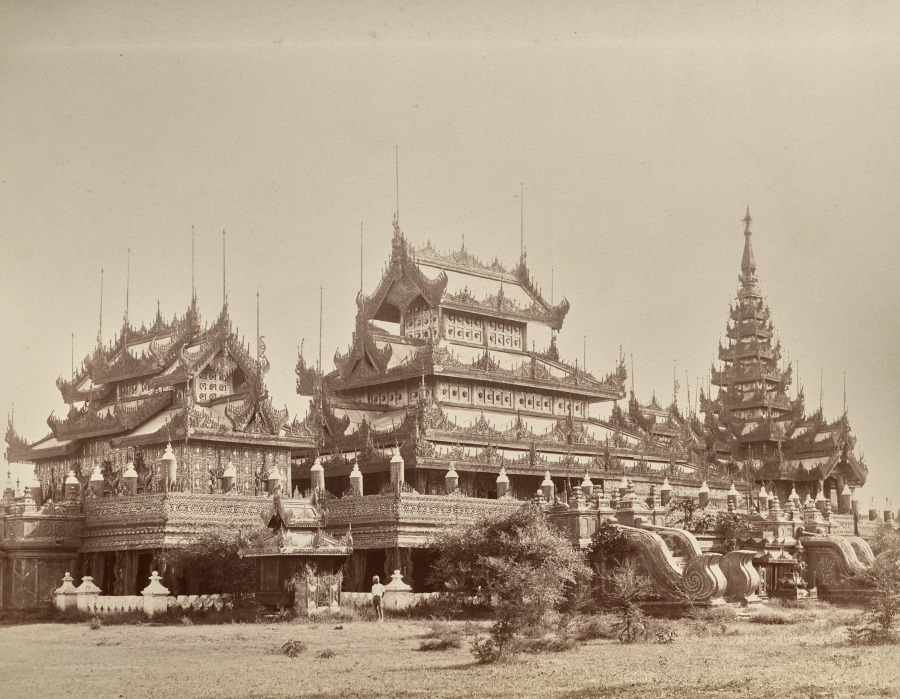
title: Untitled (ornate buildings, verso)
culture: England, 19th century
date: 1870s-1880s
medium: albumen print mounted on an album page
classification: Photograph